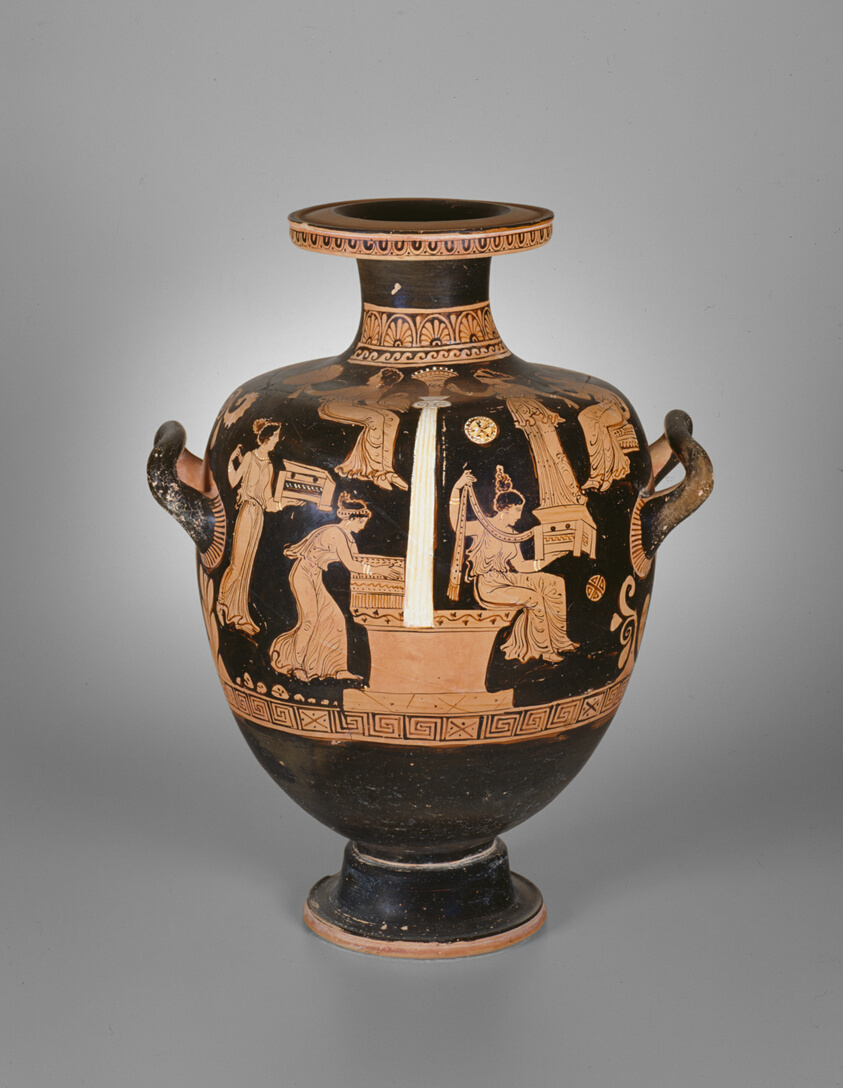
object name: Vessel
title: Hydria (Water Jar)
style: apulian, south italian, red-figure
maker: Attributed to the Iliupersis Painter; Greek; Apulia, Italy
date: 360-350 BCE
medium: terracotta, red-figure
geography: Apulia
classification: vessel; earthenware; ceramics; ancient art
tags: drinking, funerals, vessels, women